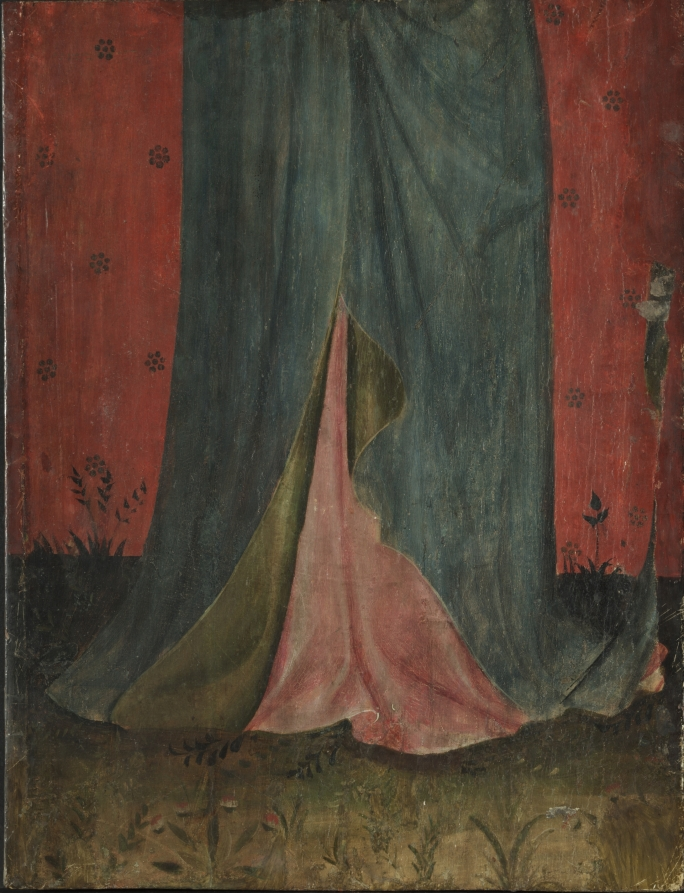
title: Coronation of the Virgin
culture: Germany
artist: Master of the Fröndenberg Altarpiece (German)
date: c. 1410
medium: tempera and gold on wood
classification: Painting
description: This panel once formed the left wing of an altarpiece originally located in a Cistercian convent in the German town of Fröndenberg. The Coronation of the Virgin was a common subject; though it is not based on a biblical text it often appeared in medieval books of hours as a focus of contemplation. It represents the culminating event in the life of Mary. Here, Christ and the Virgin are housed in an architectural setting; the Virgin kneels before Christ as he crowns her in the company of a group of angels. The color palette is particularly rich: pink, deep red, blue, and a delicate green as well as large areas of gold leaf. The well-developed, proportional figures, modeled drapery, and detailed architectural throne suggest an artist with a high level of experience and sophistication.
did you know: This is only one panel from what would have been a large altarpiece dedicated to the Virgin.